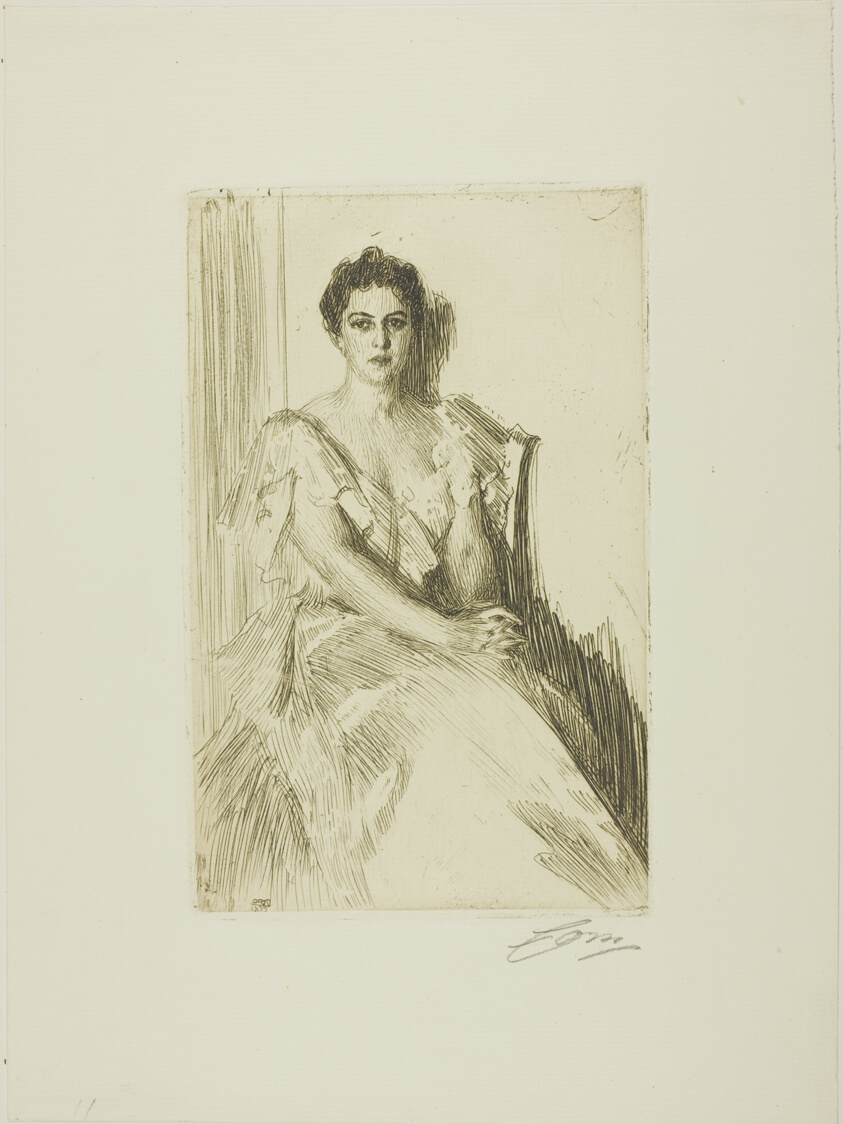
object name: Print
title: Mrs. Cleveland II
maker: Anders Zorn (Swedish, 1860-1920)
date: 1899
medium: Etching on ivory laid paper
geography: Sweden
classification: etching; print; prints and drawing